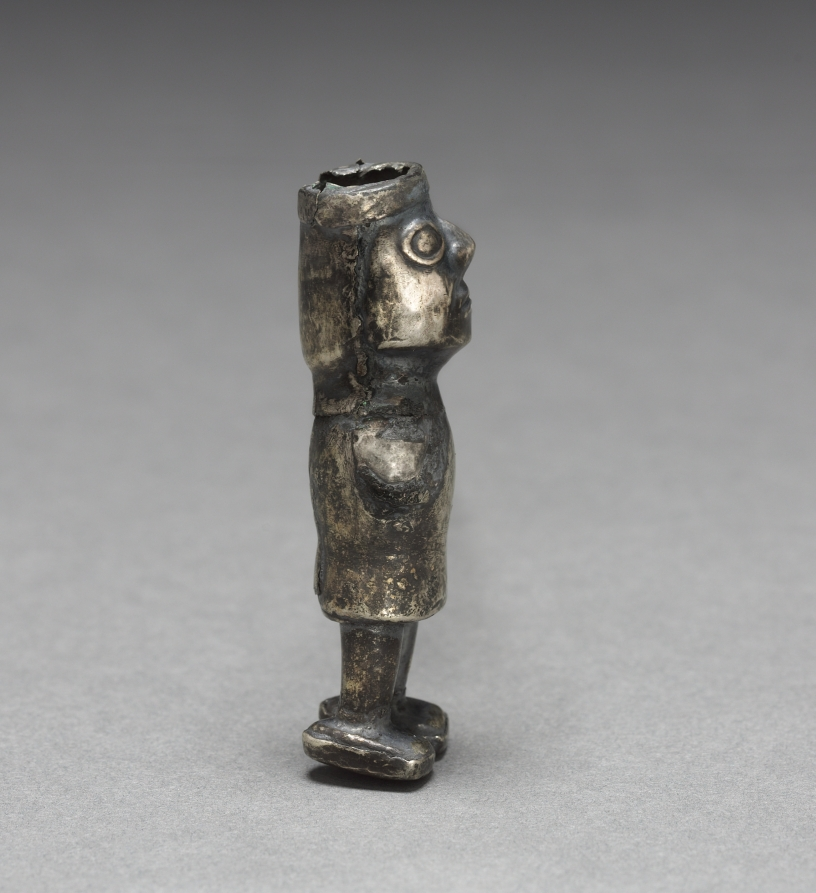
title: Figure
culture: Peru, Lambayeque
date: 1000–1532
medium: silver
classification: Metalwork